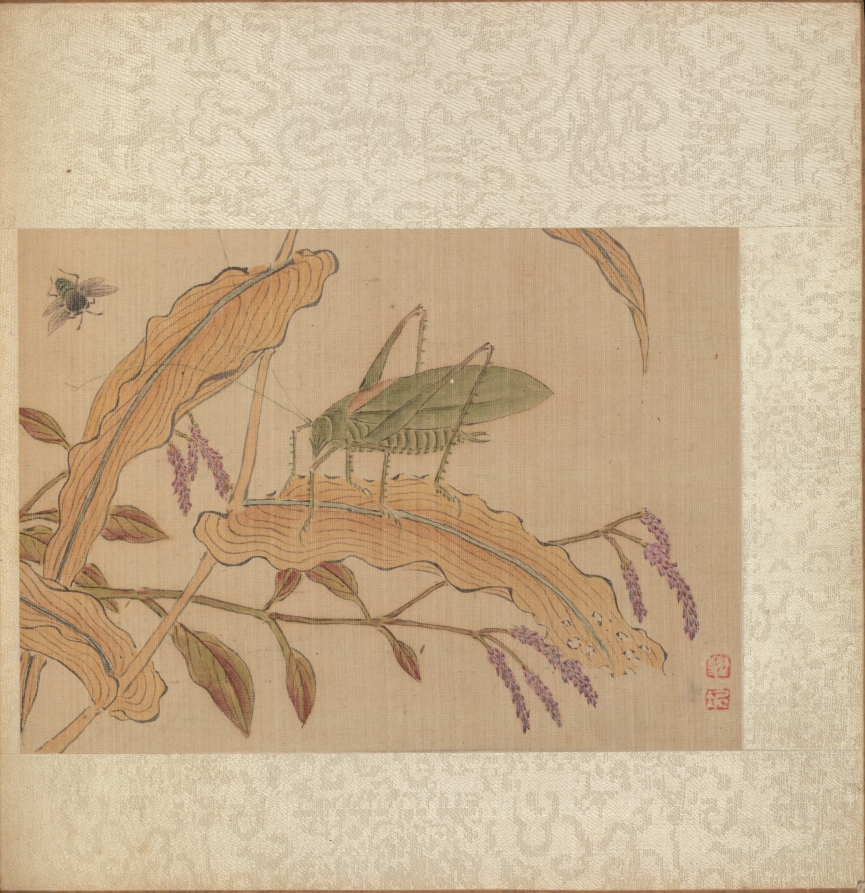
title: Album of Miscellaneous Subjects, Leaf 7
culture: China, Qing dynasty (1644-1911)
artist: Fan Qi (Chinese, 1616–after 1694)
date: early 1650s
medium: album leaf, ink and color on silk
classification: Painting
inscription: Artist seal: Fan Qi 樊圻. Poem by Han Tan 韓菼 (1637–1704): Thoughts of autumn in the nuptial chamber with the new chill arising,/ The white frost all pervasive with a bright moon shining./ Outside the window, a crisp wind conveys the sound of crickets./ Within this quiet dream, I seem to sense the fragrance of orchids.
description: Leaf 7 Han Tan's colophon reads: Thoughts of autumn in the nuptial chamber with the new chill arising, The white frost all persuasive with a bright moon shining. Outside the window, a crisp wind conveys the sound of crickets. Within this quiet dream, I seem to sense the fragrance of orchids.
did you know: The cricket stands on the yellowing leaf of a ripening rice plant.